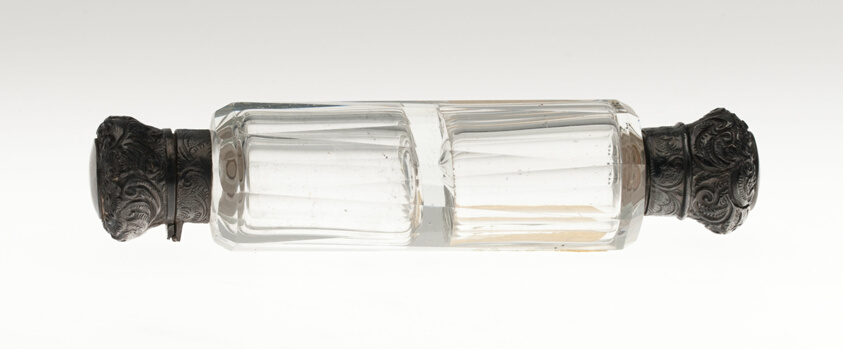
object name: Glass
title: Scent Bottle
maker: Bohemia, Czech Republic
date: c. 1840/50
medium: Glass; cut and colored with metal mounts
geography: Bohemia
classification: glass; european decorative arts